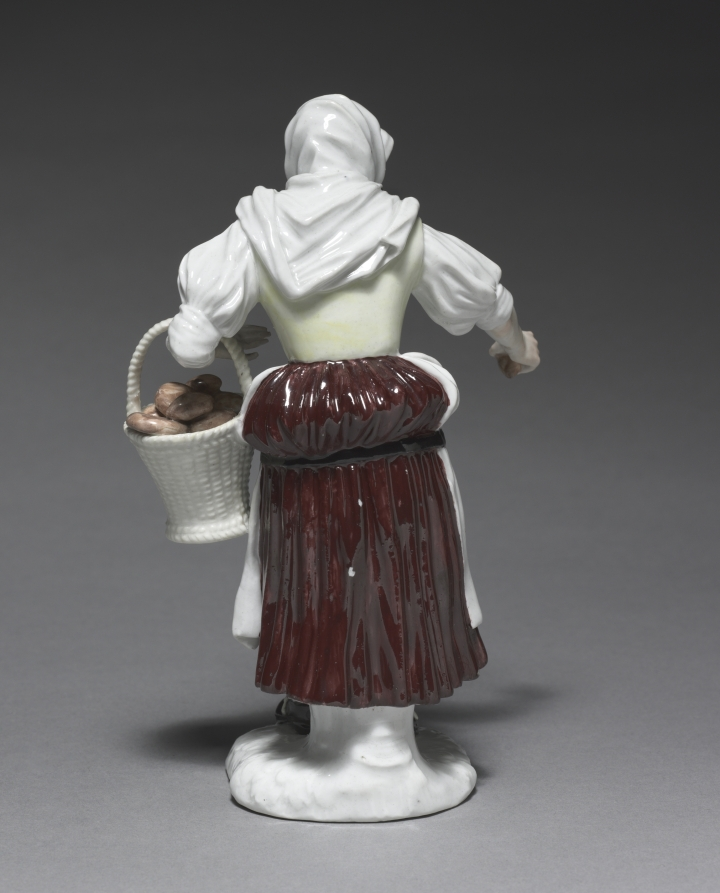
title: Peasant Woman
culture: Germany, 18th century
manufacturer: Meissen Porcelain Factory (German, est. c. 1710)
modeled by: Johann Joachim Kändler (German, 1706–1768)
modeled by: and/or Peter Reinicke (German, 1715–1768)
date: 1740–1750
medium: porcelain with enamel decoration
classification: Ceramic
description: The official Saxon porcelain factory at Meissen not only introduced the manufacture of true, hard-paste porcelain to Europe but also popularized the creation of small porcelain sculptures to be used primarily as dining table decorations. Realistic subjects based on contemporary life were introduced in the 1740s. J. J. Kaendler was the most famous of several modelers who worked at the Meissen factory.